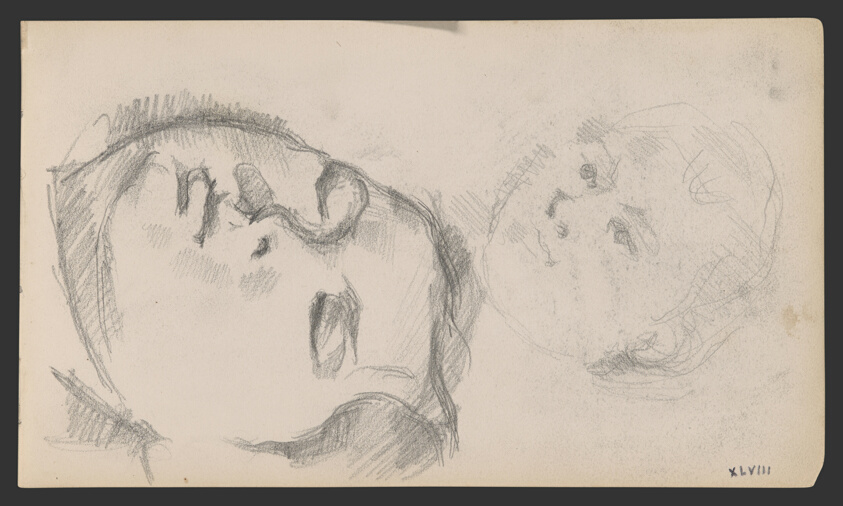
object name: Drawing and Watercolor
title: Sketchbook No. 2 (L'Estaque)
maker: Paul Cézanne; French, 1839-1906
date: 1875–86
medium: Graphite and pen and ink drawings on paper, bound into a book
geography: France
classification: sketchbook; graphite; prints and drawing; paper